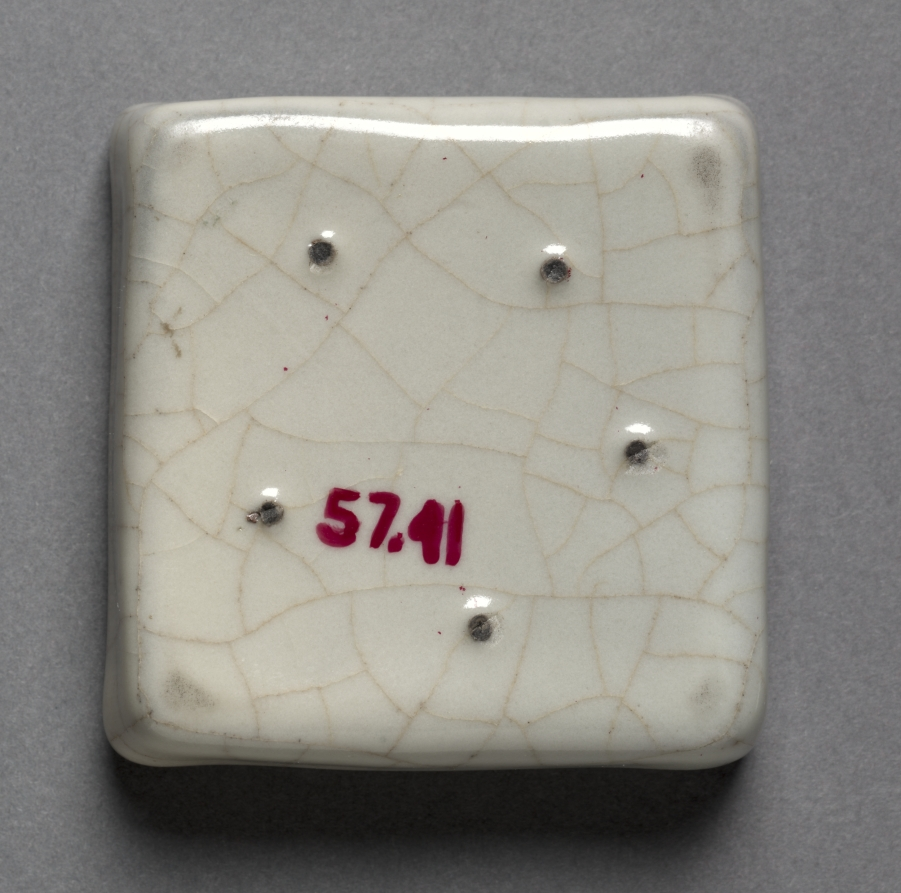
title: Square Brush Washer: Guan ware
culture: China, Hangchou, Suburban Altar Kiln, Southern Song dynasty (1127-1279)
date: 1127–1279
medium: glazed stoneware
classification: Ceramic